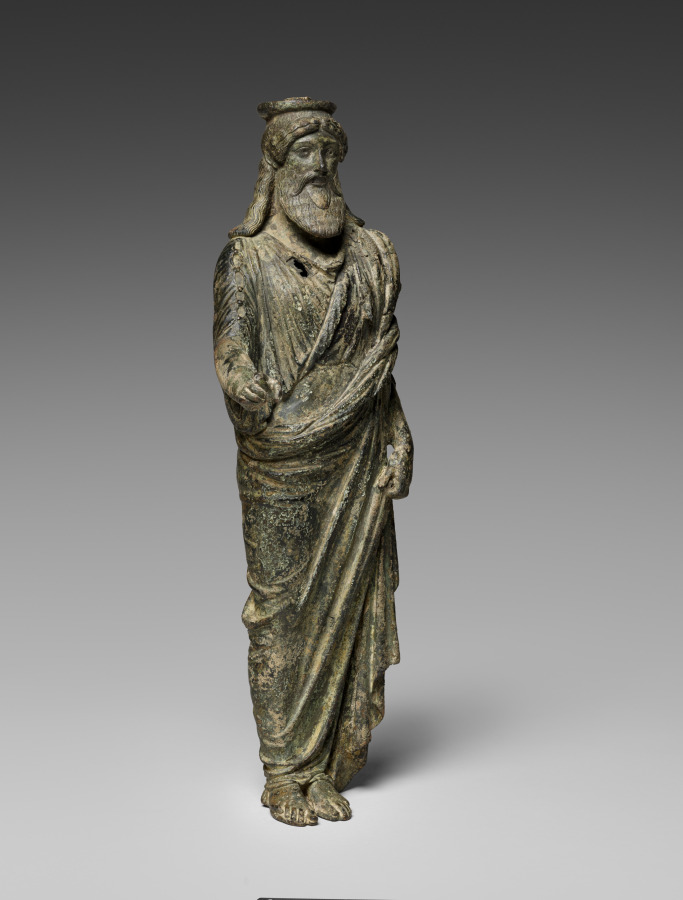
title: Statuette of Dionysos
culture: Italy, Roman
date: 50 BCE–50 CE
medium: bronze and silver and traces of gilding, hollow cast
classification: Sculpture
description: This bronze figure of Dionysos, the god of wine, theater, and the mysteries, is presented in a style recalling Archaic Greek art, most noticeably in his stiff pose and trimmed beard. The more naturalistic folds of his garment speak to a later date, in the Roman period. The disk attached at the top of the head suggests that this figure was once part of an ornate piece of furniture, perhaps a stand or support. In his right hand, the god likely held a kantharos or other attribute. He would have been further embellished with inlaid copper (lips), silver (whites of eyes), and perhaps gilding (garment).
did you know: Over his long, thin garment, Dionysos wears an animal skin, fastened on his left shoulder.